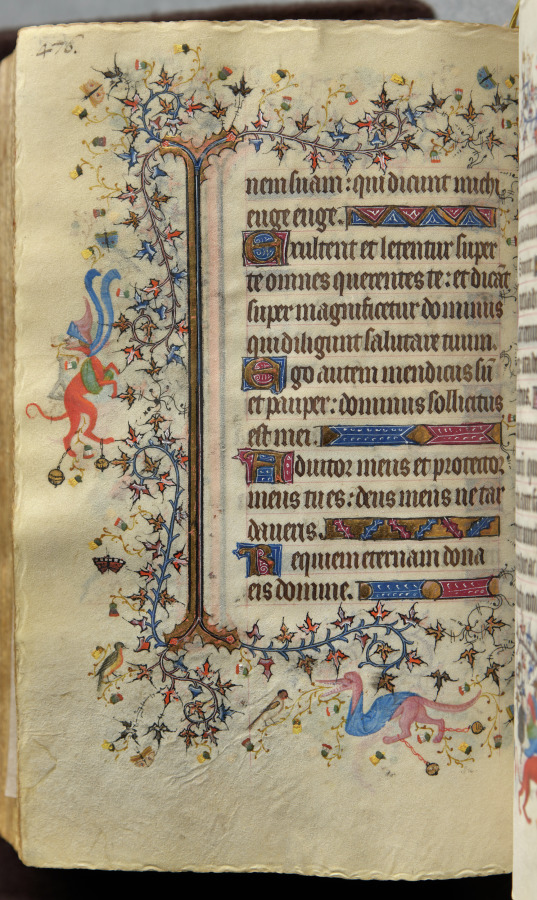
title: Hours of Charles the Noble, King of Navarre (1361-1425): fol. 232v, Text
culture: France, Paris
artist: Master of the Brussels Initials and Associates (French)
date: c. 1405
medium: ink, tempera, and gold on vellum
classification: Bound Volume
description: This precious volume was obviously highly prized by its owner, the French-born King of Navarre, who had his coat of arms painted on no less than twenty folios. Rather than directly commissioning this manuscript from a specific workshop, it seems that Charles the Noble acquired his book of hours -- perhaps ready-made for the luxury market -- while on a trip to Paris in 1404-05. A collaborative effort, six painting styles are evidenced within the pages of this codex, those of two Italians, two Frenchmen, and two Netherlanders. The painter who was responsible for the planning and decoration of the book, and who produced seventeen of the large miniatures, was a Bolognese artist known as the Master of the Brussels Initials. His principal assistant, responsible for most of the borders, was a Florentine who signed his name "Zecho" da Firenze on folio 208 verso.